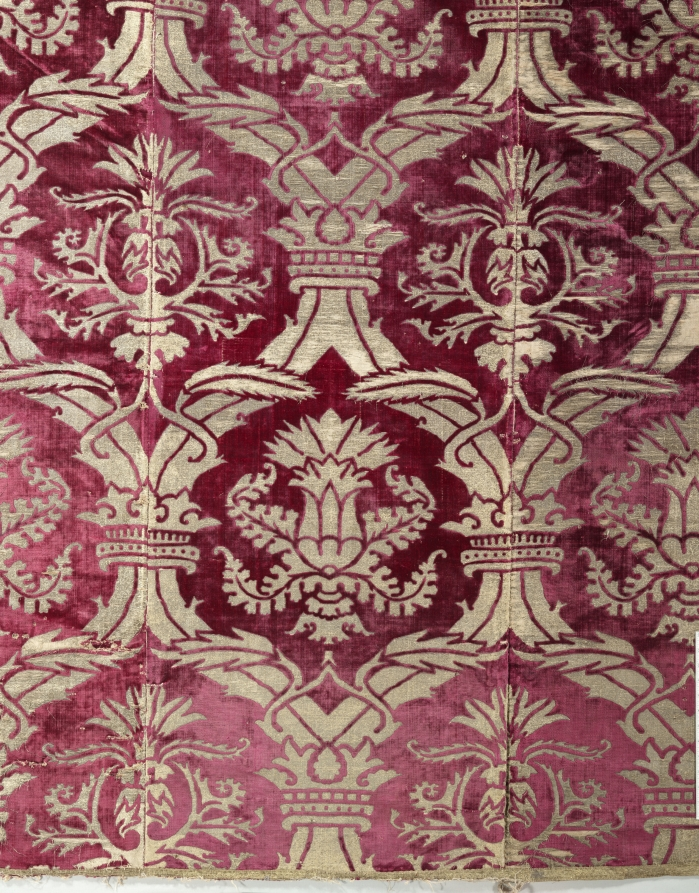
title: Brocaded Velvet Panel with Italianate Pattern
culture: Turkey, Istanbul or Bursa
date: 1575–1625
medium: Silk: velvet, brocaded; gilt-metal thread and cotton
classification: Velvet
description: Rarely are four fabric widths preserved together from any culture. This gilt-metal thread pattern combines Turkish and Italian features: the large ogival (curved) lattice clasped by crowns and the velvet structure are Turkish, and the two so-called artichoke designs are enlarged adaptations of Italian motifs. A symbol of wealth and power, this velvet panel was woven during the artistic height of the Ottoman Empire in the late 1500s. It may have covered a divan (sofa) or possibly enhanced a wall during cold winters in the imperial Topkapi Palace in Istanbul.